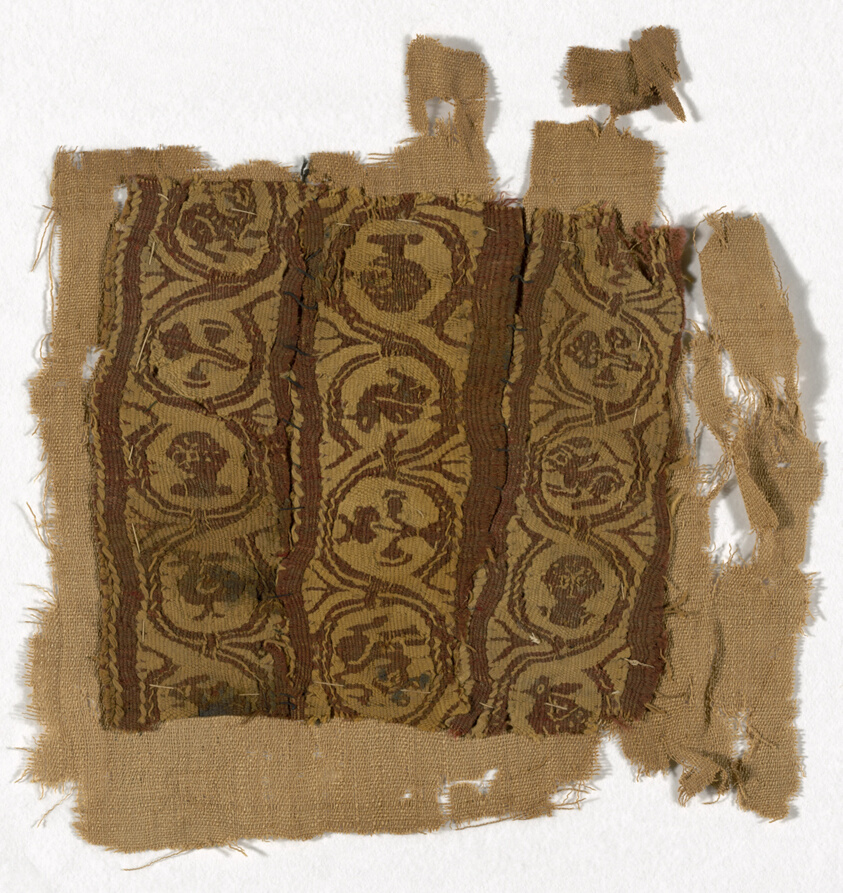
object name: Textile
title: Fragment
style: roman period (egyptian)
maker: Coptic (Egypt)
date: Roman period (30 B.C.– 641 A.D.), 4th/6th century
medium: Wool, tapestry weave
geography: Egypt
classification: textile; weaving